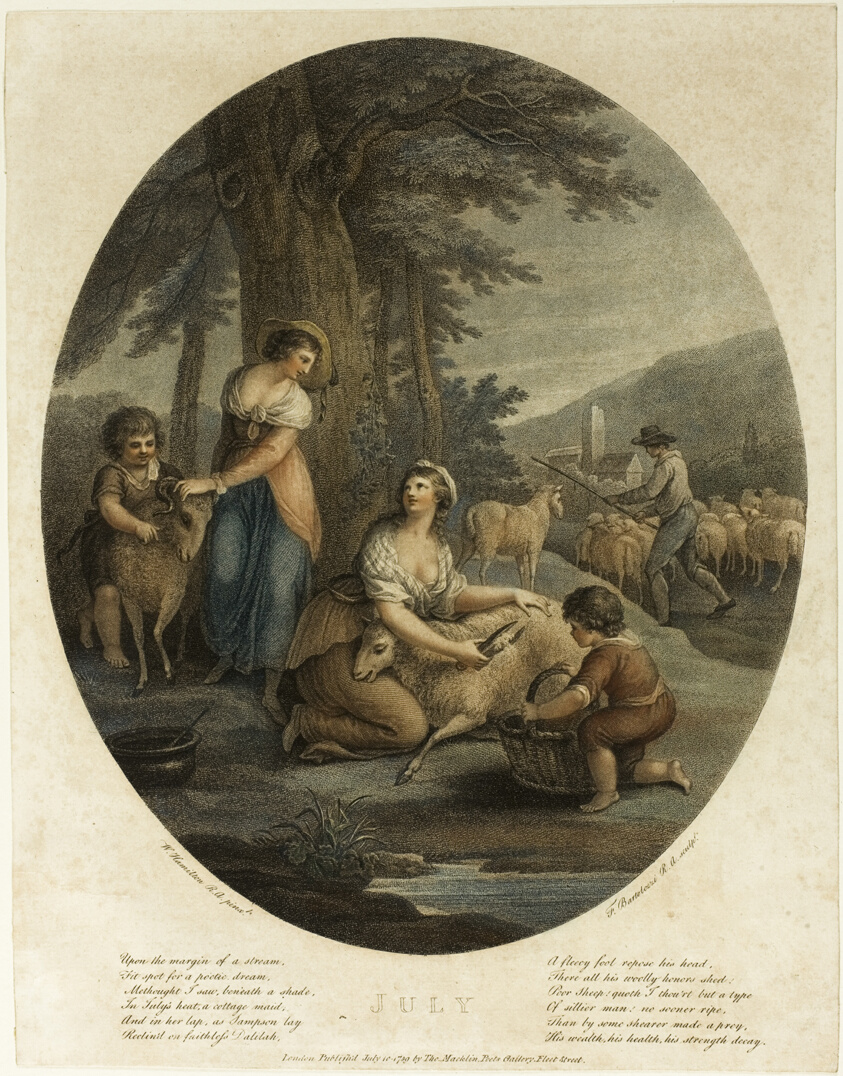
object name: Print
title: July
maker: Francesco Bartolozzi (Italian, 1727-1815); after William Hamilton (English, 1751-1801); published by John and Josiah Boydell (English, 18th century)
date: July 10, 1789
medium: Color stipple engraving on paper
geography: Italy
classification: engraving; print; prints and drawing